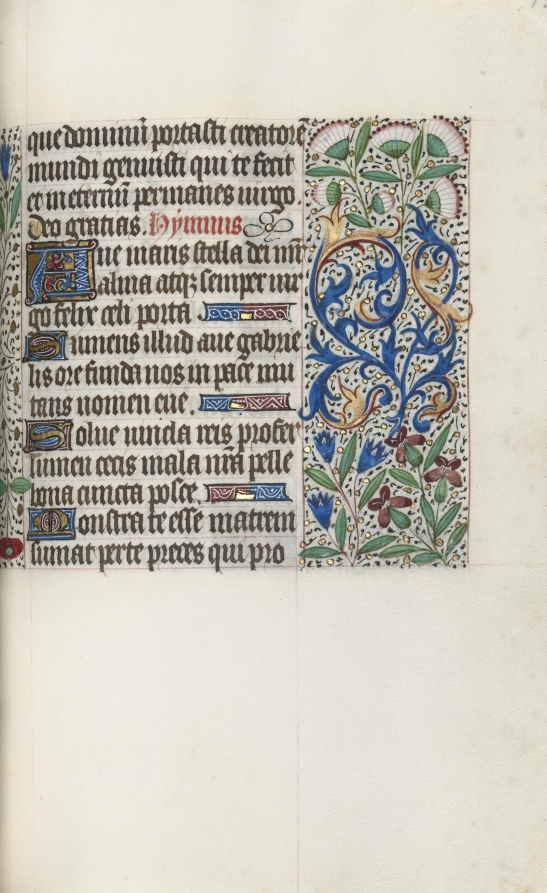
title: Book of Hours (Use of Rouen): fol. 73r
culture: France, Rouen, 15th century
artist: Master of the Geneva Latini (French, active Rouen, 1460–80)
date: c. 1470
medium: ink, tempera, and gold on vellum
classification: Bound Volume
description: In the late 1400s and early 1500s Rouen was an established and important center of book production. The city’s cathedral had a wealthy chapter that spent large sums of money to commission books and to maintain its extensive library. The stationers and booksellers would have likely been concentrated in or near the cathedral precinct. This artist, named after a manuscript now in Geneva, was Rouen’s principal illuminator during the second half of the 1400s.